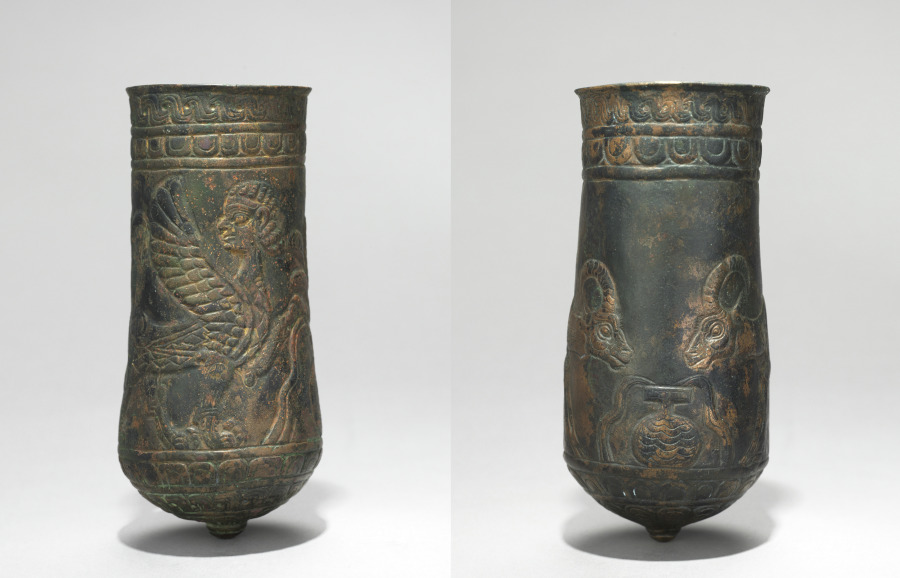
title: Button-Based Situlas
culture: Iran, Luristan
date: 900–700 BCE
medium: bronze, repoussé, punched, incised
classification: Metalwork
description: The metalworkers of Luristan provided the Assyrian empire with elaborate bronze ornaments and vessels. These two situla have symmetrical decoration—one with ibexes drinking from an overflowing water jar; the other, with sphinxes.